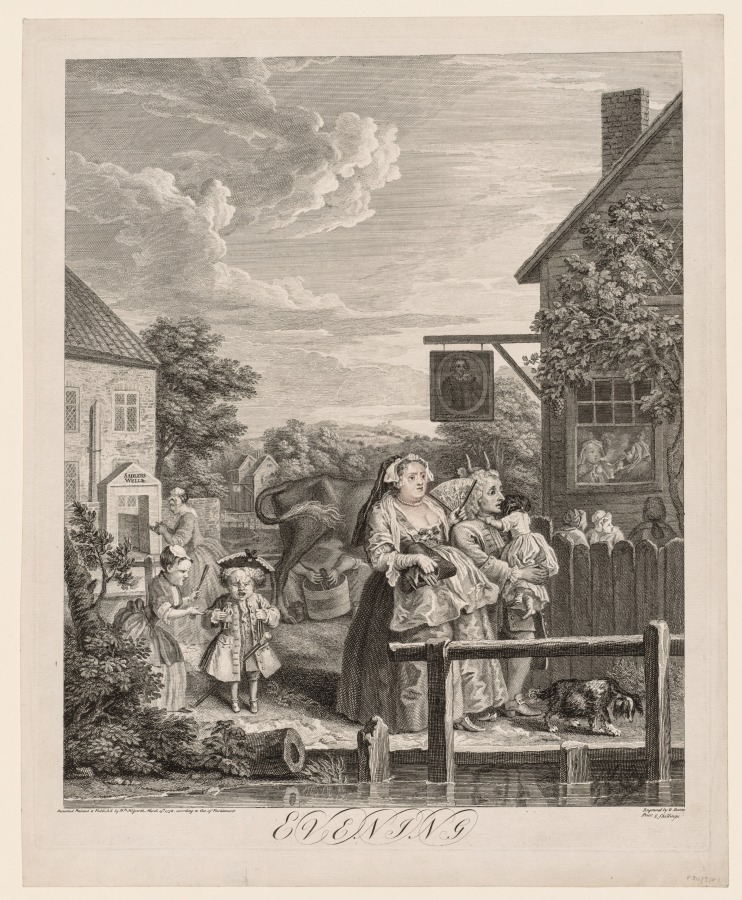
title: The Four Times of Day: Evening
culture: England, 18th century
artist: William Hogarth (British, 1697–1764)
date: 1738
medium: engraving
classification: Print